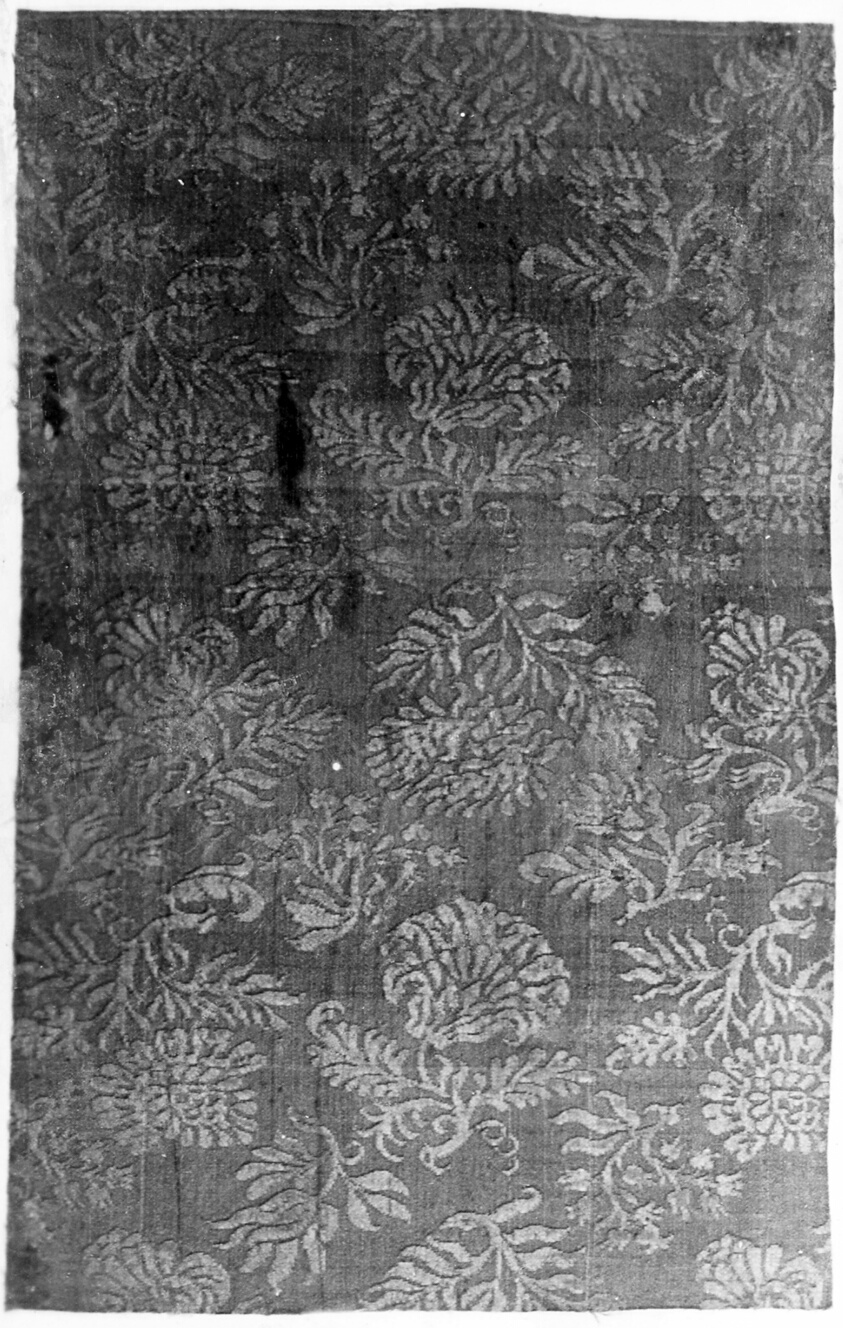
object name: Textile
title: Fragment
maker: Italy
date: 1600/50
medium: silk damask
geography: Italy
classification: textile; weaving